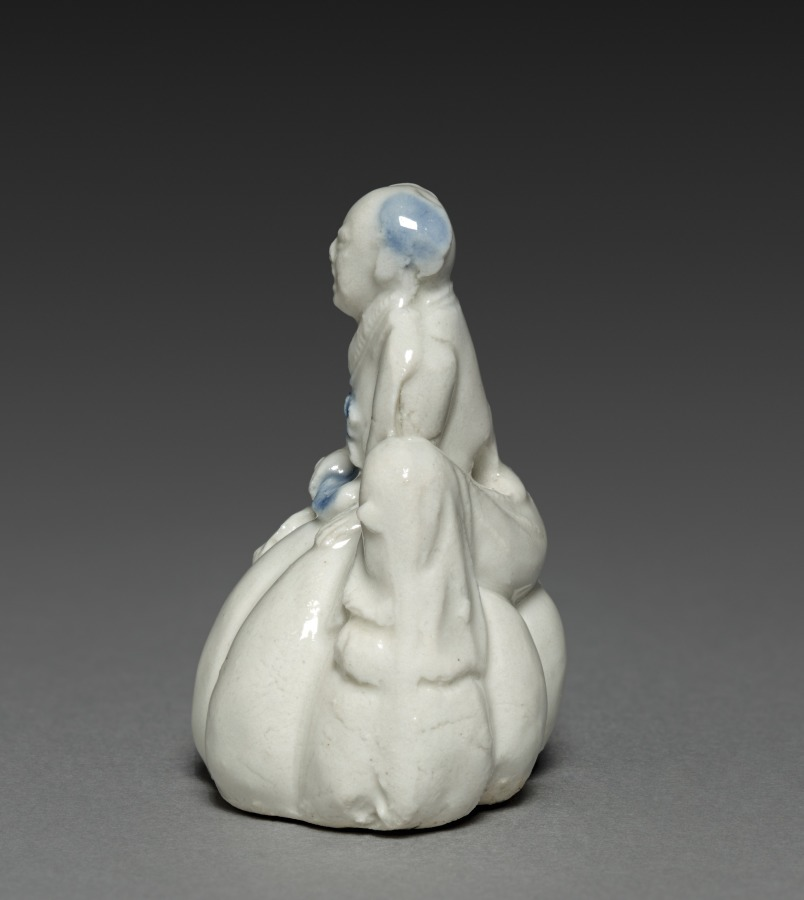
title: Waterdropper in Shape of Chinese Boy Seated on a Gourd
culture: Japan, Edo period (1615–1868)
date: 1700s to mid-1800s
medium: porcelain, molded and carved, with underglaze blue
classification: Ceramic